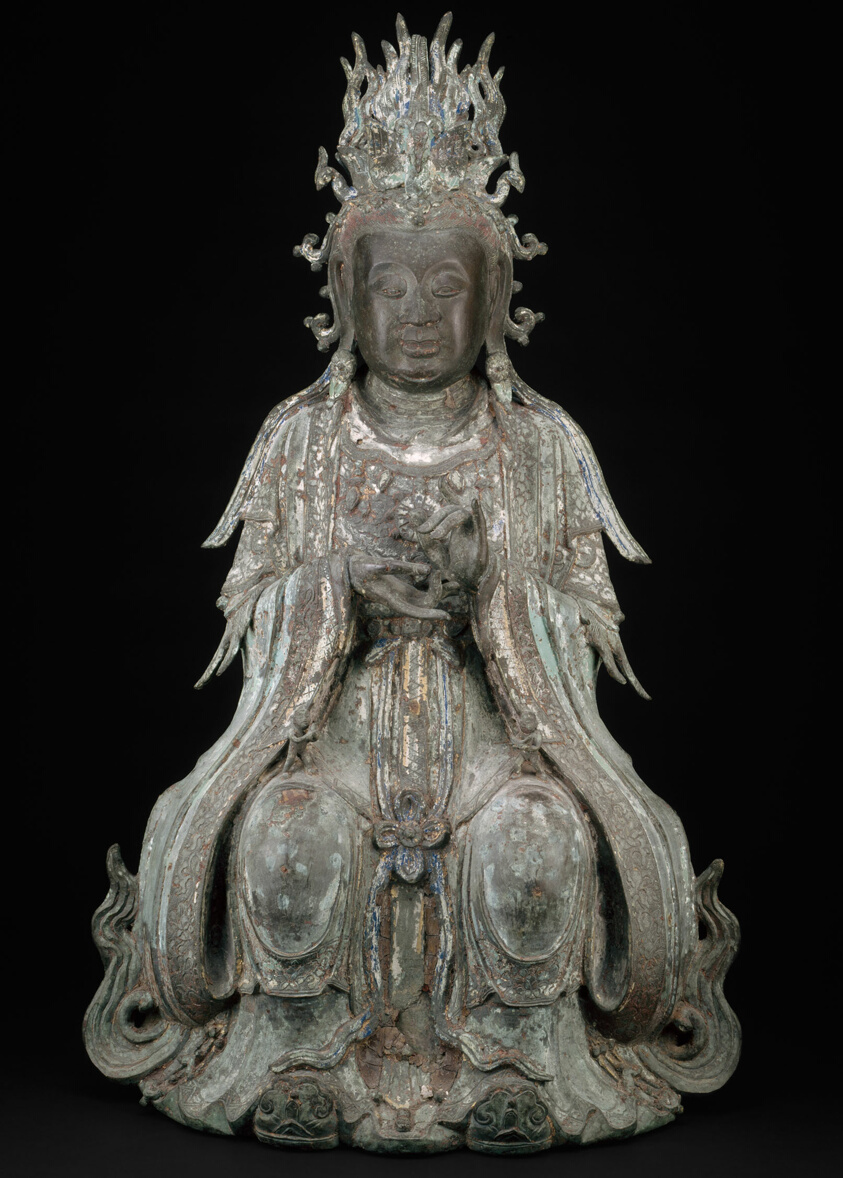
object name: Sculpture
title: Sovereign of the Clouds of Dawn (Bixia Yuanjun)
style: Chinese (culture or style)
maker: China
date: Ming dynasty (1368–1644), late 14th/15th century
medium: Bronze with traces of pigment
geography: China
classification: bronze; metal; sculpture; asian art